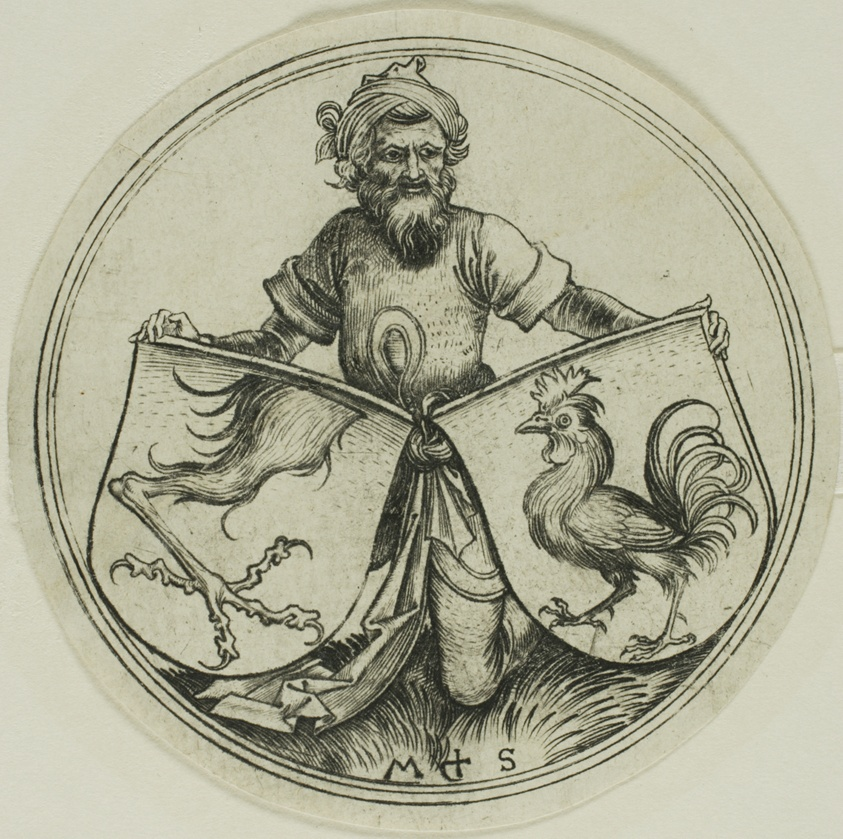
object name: Print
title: Shield with a Griffin's Foot and Shield with a Cock Held by a Moor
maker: Martin Schongauer (German, c. 1430/50-1491)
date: c. 1480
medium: Engraving on paper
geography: Germany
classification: engraving; print; prints and drawing